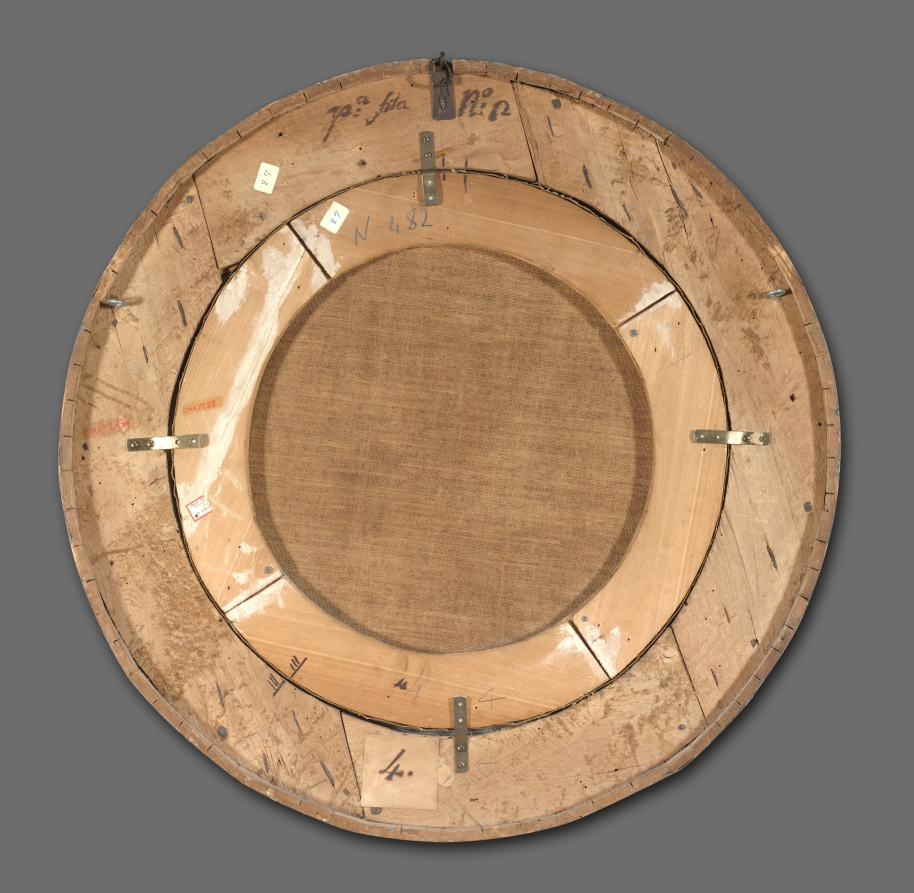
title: Scenes of Witchcraft: Morning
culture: Italy, 17th century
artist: Salvator Rosa (Italian, 1615–1673)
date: c. 1645–1649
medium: oil on canvas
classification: Painting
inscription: Signed: "SR [monogram]"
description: Rosa's first scene depicts a young witch who plunges her knife into a writhing amphibian at dawn. The dark clouds of daybreak and anthropomorphic crags provide a gloomy atmosphere, while malevolent birds with piercing beaks hover around the central stabbing, focusing the viewer's attention on the witch's vicious act. The only beautiful enchantress Rosa ever painted, her elegance and ability to transform men into animals evokes the goddess Circe. But Rosa wasn't interested in classical imagery; he inverted expectations by transforming Circe into an explicitly violent sorceress. Her calm expression makes the terrifying gesture of upraised human hands among the birds even more disturbing.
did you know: The artist chose the painting's shape to reference the foundational role of the circle in practicing magic.